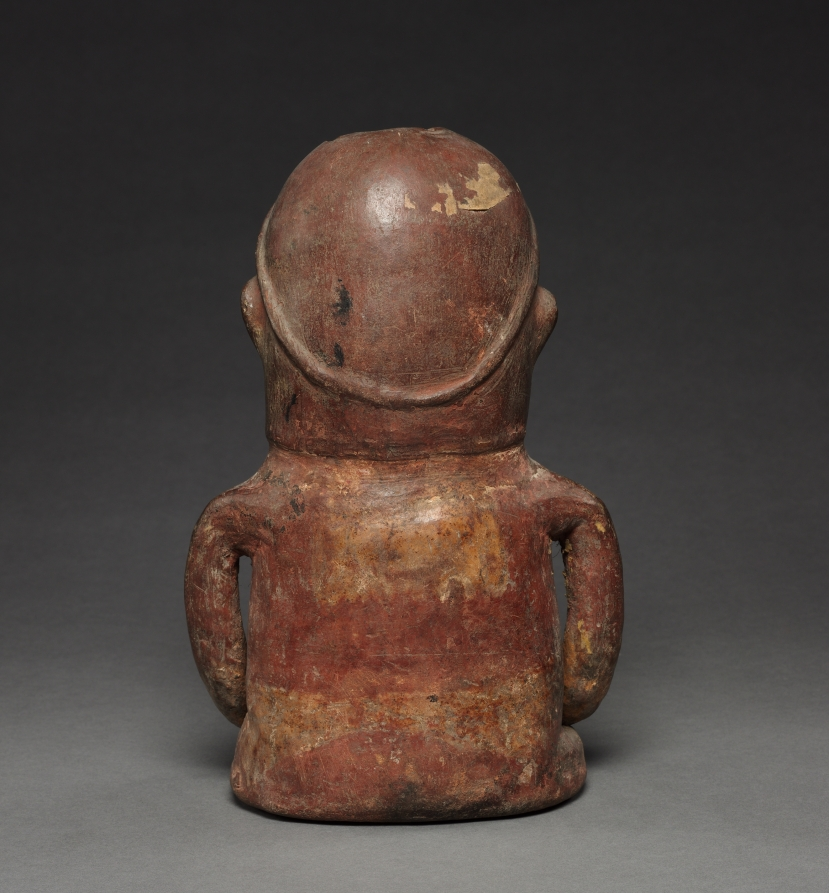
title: Seated Figure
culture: Colombia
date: before 1921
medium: red ware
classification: Ceramic